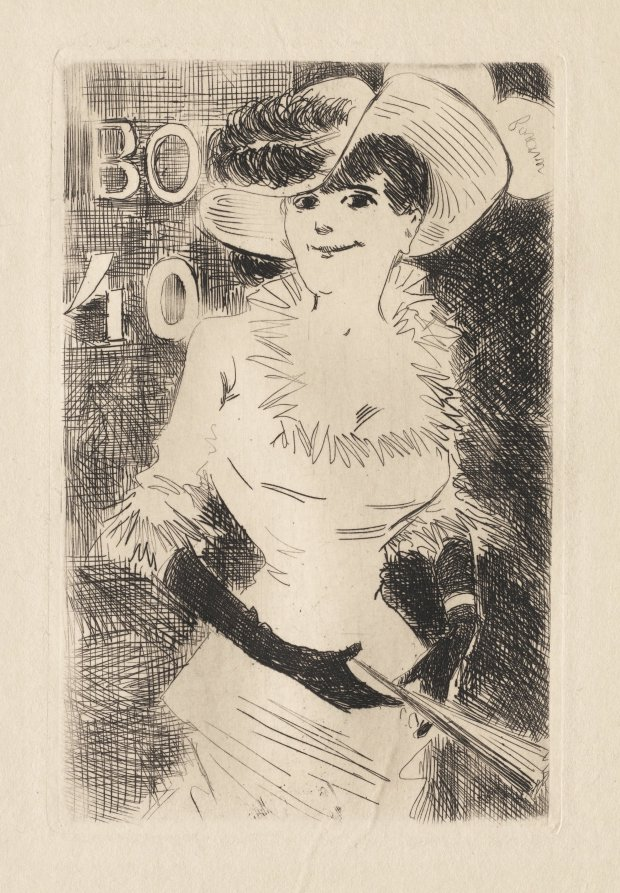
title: The Walker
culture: France, 19th century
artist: Jean Louis Forain (French, 1852–1931)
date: 1880–86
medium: etching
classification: Print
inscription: signed upper left in plate: forain